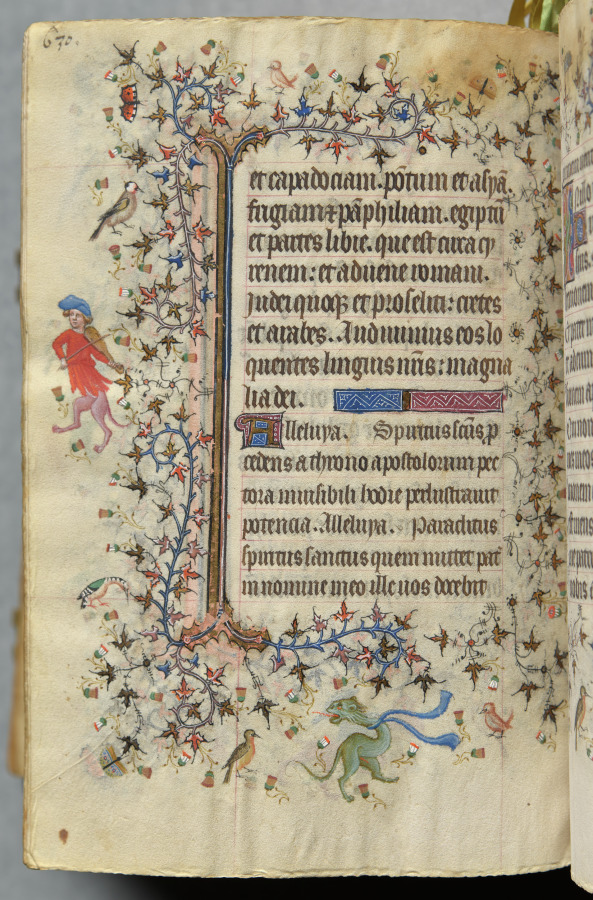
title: Hours of Charles the Noble, King of Navarre (1361-1425), fol. 309v, Text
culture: France, Paris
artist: Master of the Brussels Initials and Associates (French)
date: c. 1405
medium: ink, tempera, and gold on vellum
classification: Bound Volume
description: This precious volume was obviously highly prized by its owner, the French-born King of Navarre, who had his coat of arms painted on no less than twenty folios. Rather than directly commissioning this manuscript from a specific workshop, it seems that Charles the Noble acquired his book of hours -- perhaps ready-made for the luxury market -- while on a trip to Paris in 1404-05. A collaborative effort, six painting styles are evidenced within the pages of this codex, those of two Italians, two Frenchmen, and two Netherlanders. The painter who was responsible for the planning and decoration of the book, and who produced seventeen of the large miniatures, was a Bolognese artist known as the Master of the Brussels Initials. His principal assistant, responsible for most of the borders, was a Florentine who signed his name "Zecho" da Firenze on folio 208 verso.